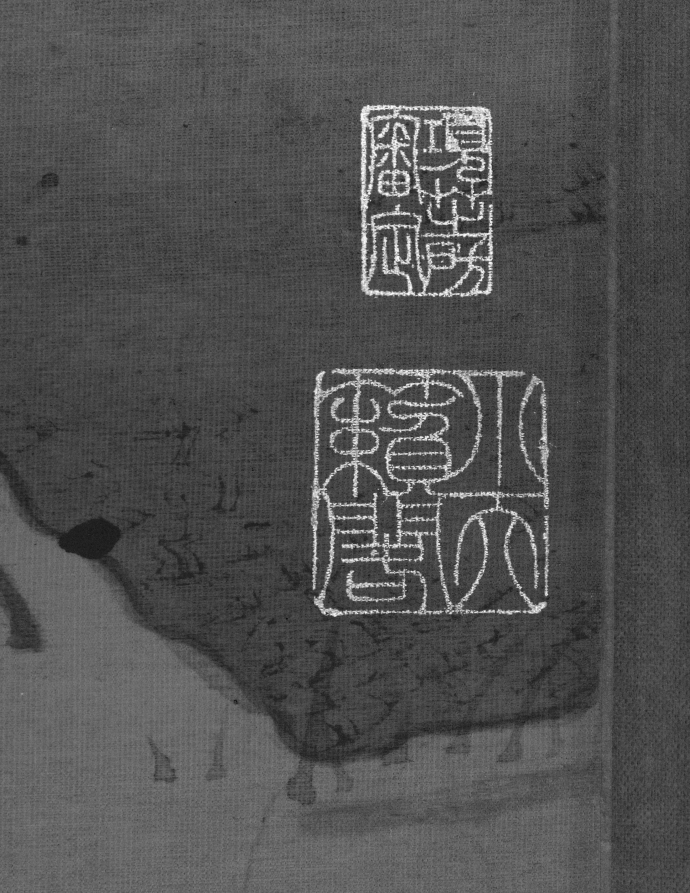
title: Xu Jingyang Moving His Family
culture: China, Ming dynasty (1368–1644)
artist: Cui Zizhong (Chinese, 1574–1644)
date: 1644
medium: Hanging scroll; ink and color on silk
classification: Painting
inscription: Artist's 2 seals: Pei-hai, Cui Zizhong yin.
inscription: 9 additional seals: 2 of Xiang Yuan (18th-19th c.); 1 of Tang Zuomei (late 18th-19th c.); 1 of Zhang Heng 張珩 (1915-1963); 1 of C. C. Wang 王季遷 (1907–2003); 4 unidentified.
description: Xu Jingyang was a dedicated fourth-century Confucian official who allegedly turned into a Daoist immortal. This scroll depicts the legend that when he attained immortality, he took his entire household, including chickens and dogs, to paradise. Cui Zizhong’s painting style intentionally referenced ancient masters. Typical of the pre-Song dynasty landscape tradition, there is the use of blue and green colors and an emphasis on outline rather than texture. While the trembling outlines are reminiscent of earlier painters, the flickering light on rocks and trees is a stylistic feature of Cui’s own time.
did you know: Xu Jingyang, wearing red, is in the upper register of figures, while below his servants transport a rooster, dog, and other supplies.